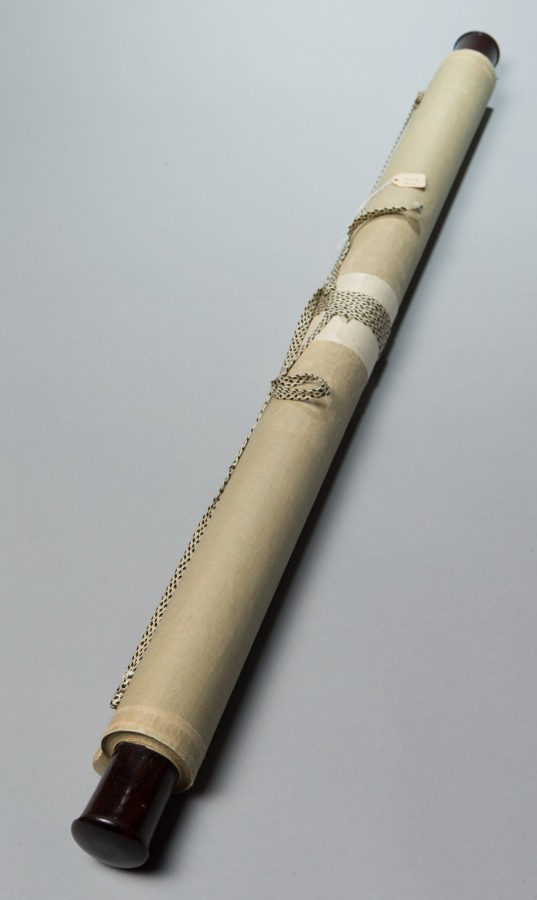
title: Looking for a Monastery in the Misty Mountains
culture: China, Ming dynasty (1368–1644)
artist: Chen Chun (Chinese, 1483–1544)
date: 1500–1544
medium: hanging scroll, ink on paper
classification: Painting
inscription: Artist's inscription, signature, and 2 seals: Row after row of misty trees envelop the Buddhist Monastery./ But the rustic who comes to find it will not lose his way./ Just across the wooden bridge, the dusty world is cut off;/ Among the countless falling petals, birds are singing confusedly. Daofu 道複 composed [this]. [seals] Fufu shi 復甫; Baiyang shanren 白陽山人. trans. WKH/LYSL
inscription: 3 additional unidentified seals.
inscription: 1 additional unidentified seal on the back of the mounting.